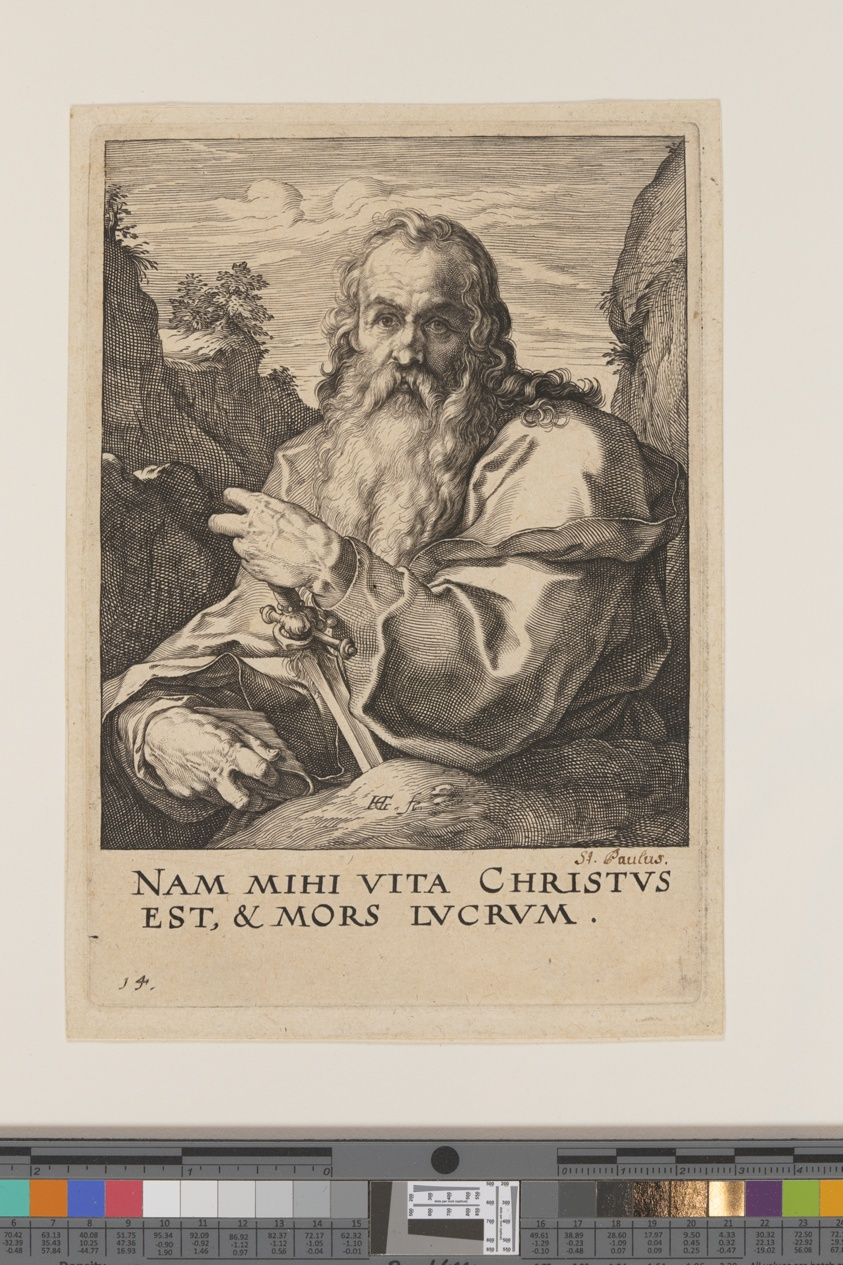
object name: Print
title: St Paul, from Christ, the Apostles and St Paul with the Creed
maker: Hendrick Goltzius (Dutch, 1558–1617)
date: 1589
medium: Engraving on ivory laid paper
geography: Netherlands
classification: engraving; paper; print; prints and drawing